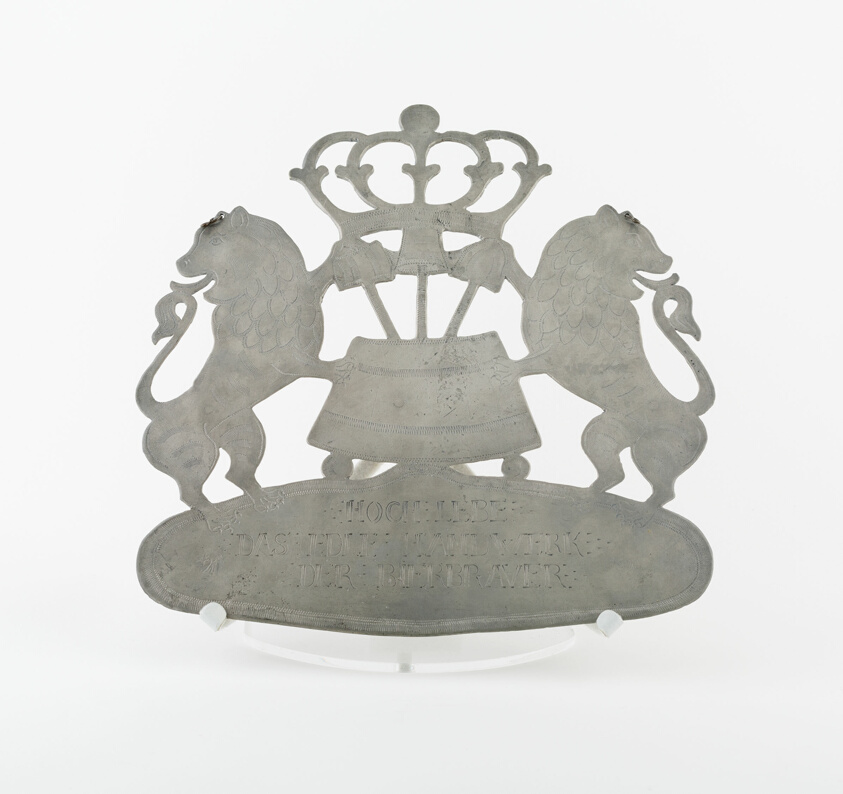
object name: Metalwork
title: Guild Plaque for a Beer Brewer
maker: Bavaria, Germany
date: 1790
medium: Pewter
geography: Bavaria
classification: pewter; metalwork; european decorative arts